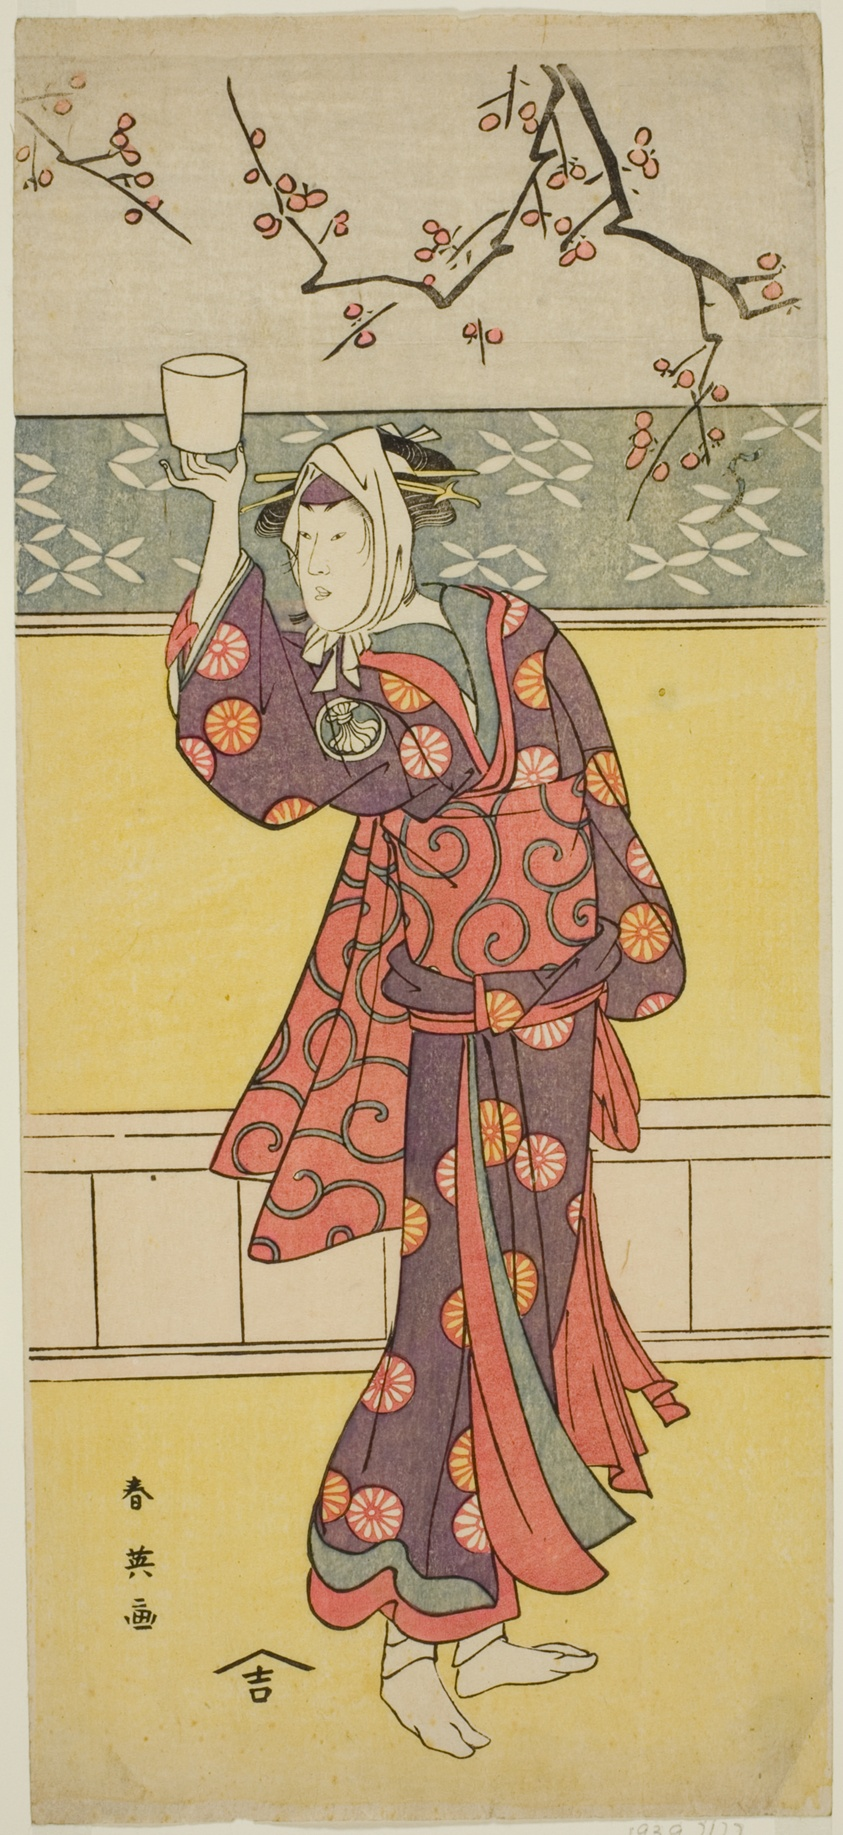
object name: Print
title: The Actor Segawa Tomisaburo II in an Unidentified Role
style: Japanese (culture or style)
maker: Katsukawa Shun'ei (Japanese, 1762-1819)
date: c. 1793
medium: Color woodblock print; hosoban; from a multisheet composition (?)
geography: Japan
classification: woodblock print; print; asian art